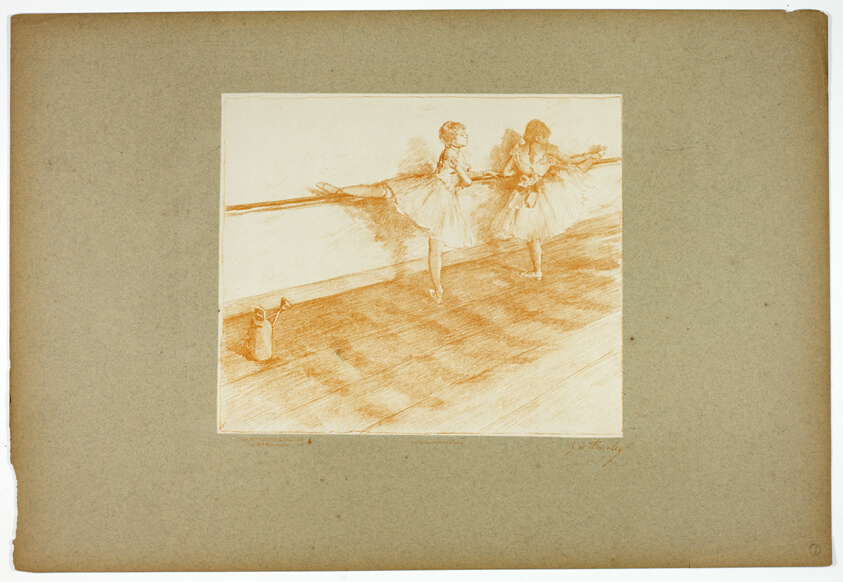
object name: Print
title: Dancers at the Bar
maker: Georges-William Thornley (French, 1857-1935); after Edgar Degas (French, 1834-1917); printed by Atelier Becquet (French, 19th century); published by Boussod, Valadon, & Company (French, 18th-19th century)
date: 1889–90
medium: Lithograph in ochre on paper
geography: France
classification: lithograph; print; prints and drawing